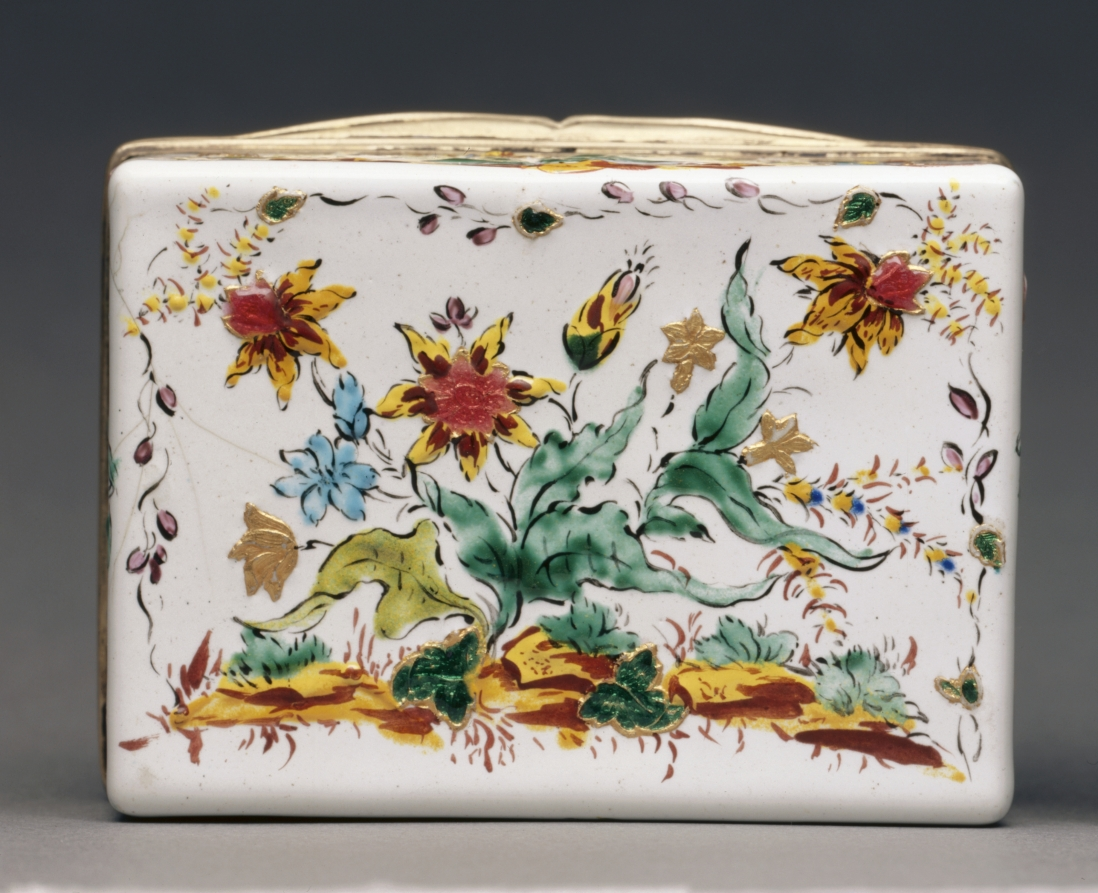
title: Box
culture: France, 18th century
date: 1749–50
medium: silver gilt and enamel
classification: Enamel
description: Chinoiserie in 18th-century France incorporated imitations of East Asian motifs, designs, and ornaments into European art. These imitations were often distorted by the European imagination and were not accurate representations of the cultures from which they drew inspiration. Elements of chinoiserie in this box can be seen primarily on the lid where enormous, vibrantly colored flowers tower over two crouching figures and a grouping of buildings.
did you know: The flower petals on the box lid are raised, an effect produced by drops of transparent enamel placed on the box’s surface that imitates polished gemstones or pearls.